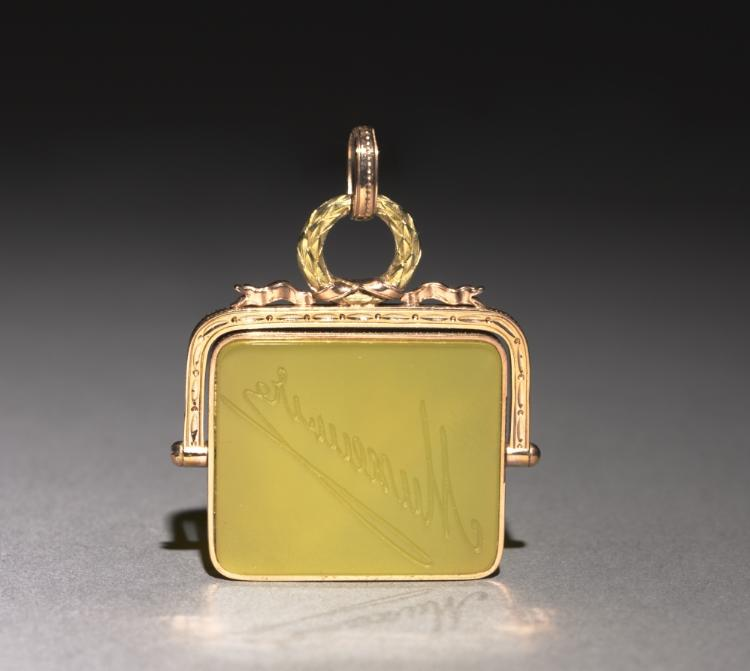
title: Swivel Seal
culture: Russia, St. Petersburg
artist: firm of Peter Carl Fabergé (Russian, 1846–1920)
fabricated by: Mikhail Evlampievich Perkhin (Russian, 1860–1903)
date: before 1896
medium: gold mounts, yellow stone (or glass)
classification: Miscellaneous